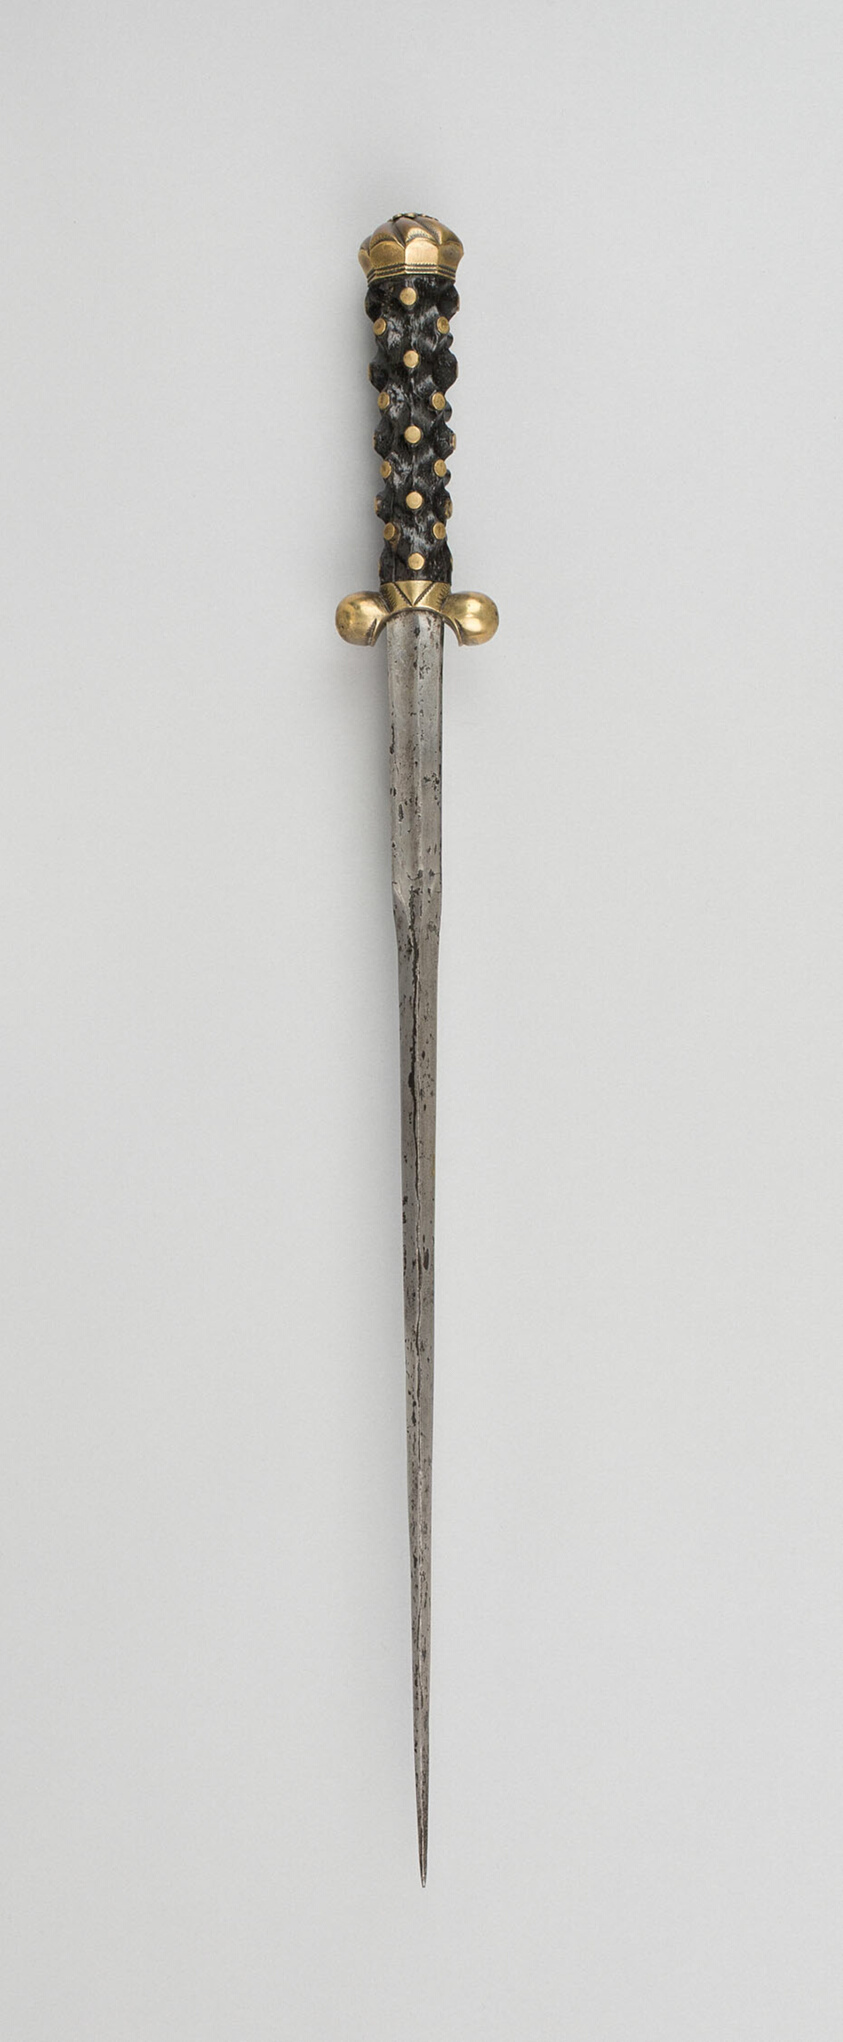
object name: Arms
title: Ballock Dagger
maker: North European, possibly French, Bourgogne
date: early 16th century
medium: Wood and brass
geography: Burgundy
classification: edged weapon-dagger; arms; arms and armor